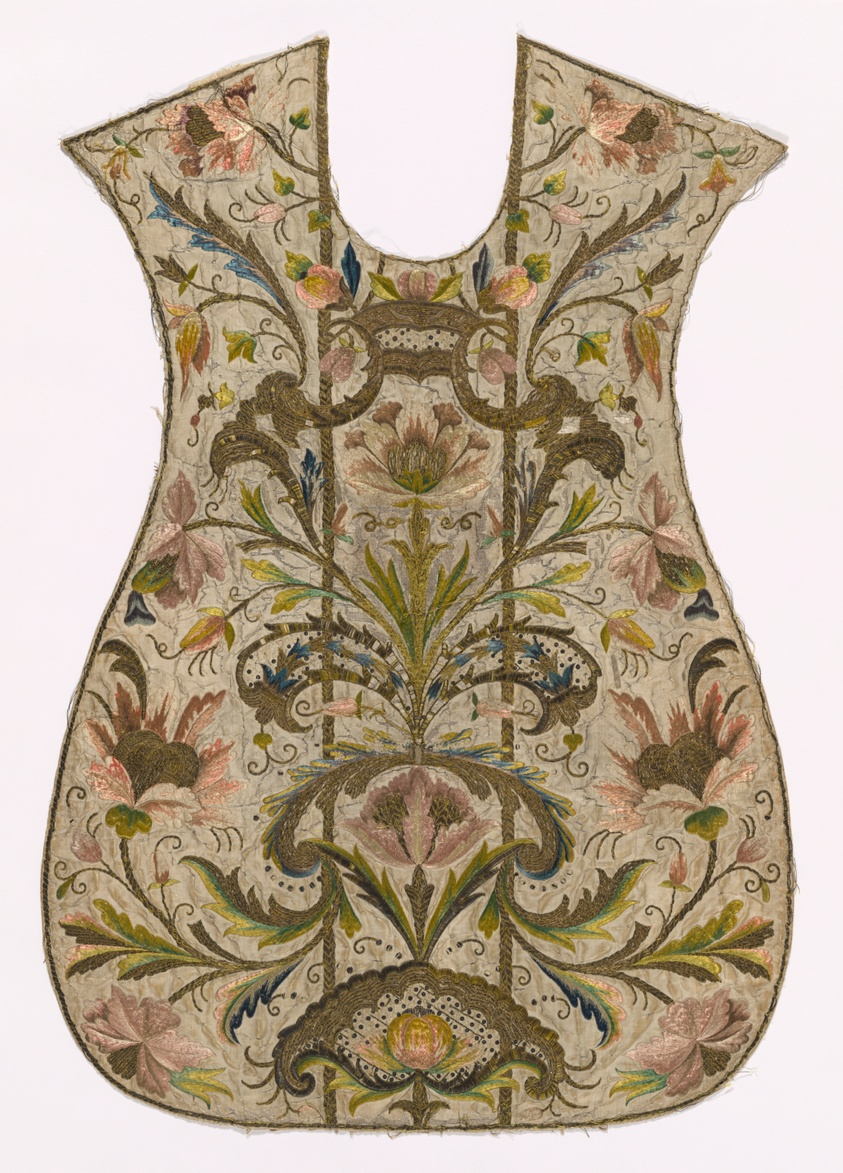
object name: Costume and Accessories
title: Chasuble (Front)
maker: Italy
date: 1701/25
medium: Silk, plain weave; embroidered in silk, gilt-metal strip, and gilt-metal-strip-wrapped silk in double running, satin, and padded satin stitches; laid work and couching; paillettes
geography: Italy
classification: textile; needlework (visual works); liturgical; costume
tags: flowers, foliage